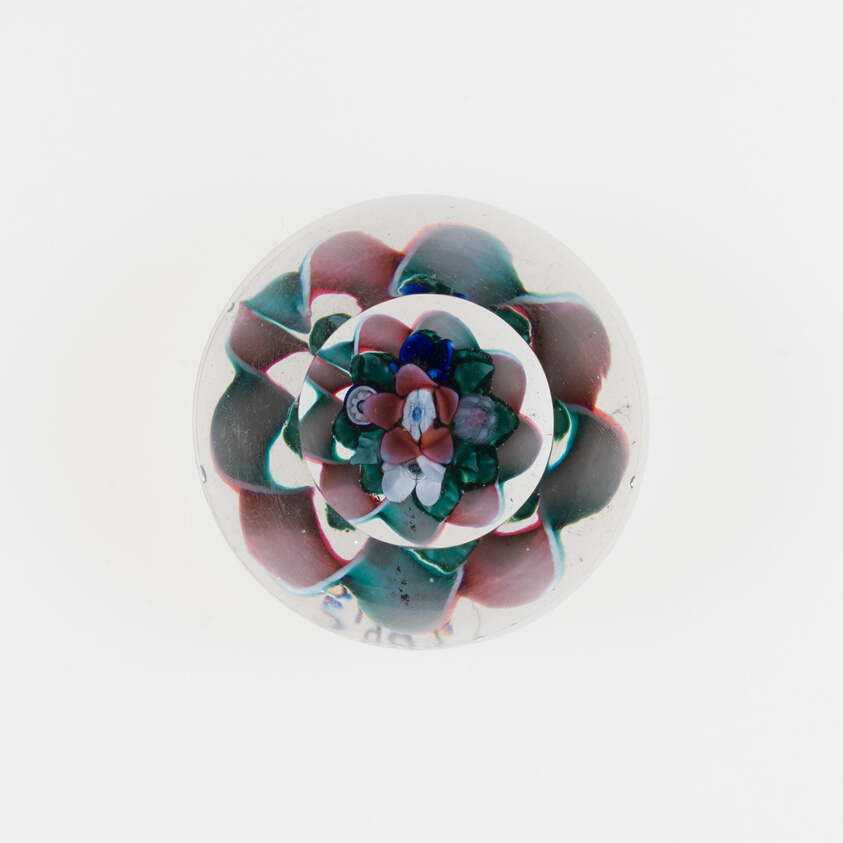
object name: Glass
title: Paperweight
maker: Boston and Sandwich Glass Company (Sandwich, Massachusetts, 1826-1888)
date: c. 1850–1900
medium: Glass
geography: Sandwich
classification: paperweight; fauna/flora/fruit; european decorative arts; glass